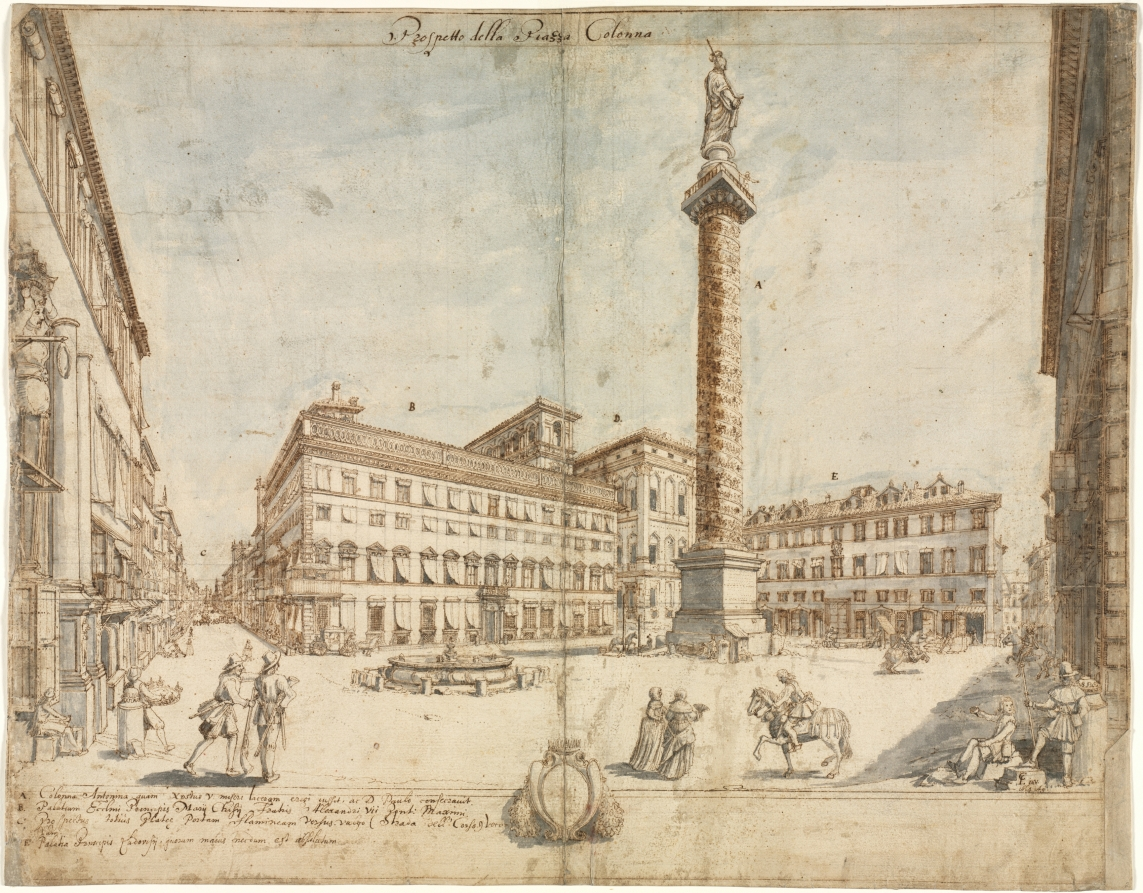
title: Eighteen Views of Rome: The Piazza Colonna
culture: Flanders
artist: Lievin Cruyl (Flemish, c. 1640-c. 1720)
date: 1664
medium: pen and brown ink and brush and gray and blue wash over stylus and graphite; framing lines in brown ink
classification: Drawing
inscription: signed, lower right, in brown ink: [artist monogram: LC] inv. / 1664 Ag. ; by artist, upper center, in brown ink: Prospetto della Piazza Colonna ; by artist, throughout composition, in brown ink: [the letters A-E] ; by artist, lower left, in brown ink: A. Colonna Antonina, quam Xystus V. misere laceram erigi ussit, ac D Paulo conservavit. / B. Palatium Ecclmi Principis Marij Chisij Fratris Alexandri vii Pont: Maximi. / C Prospectus totius Plateæ Portam Flamineam versus.vulgo (Strada dell'Corso) Voca= / tam. / E Palatia Principis Ludovisij, quorum maius necdum est absolutum. ; VERSO, upper left, in brown ink?: 5 upper left, in graphite: 545 ; ON STRIPS OF PAPER MOUNTED TO VERSO, lower right, in graphite: Albertina 20968 ; lower right, in graphite: #2